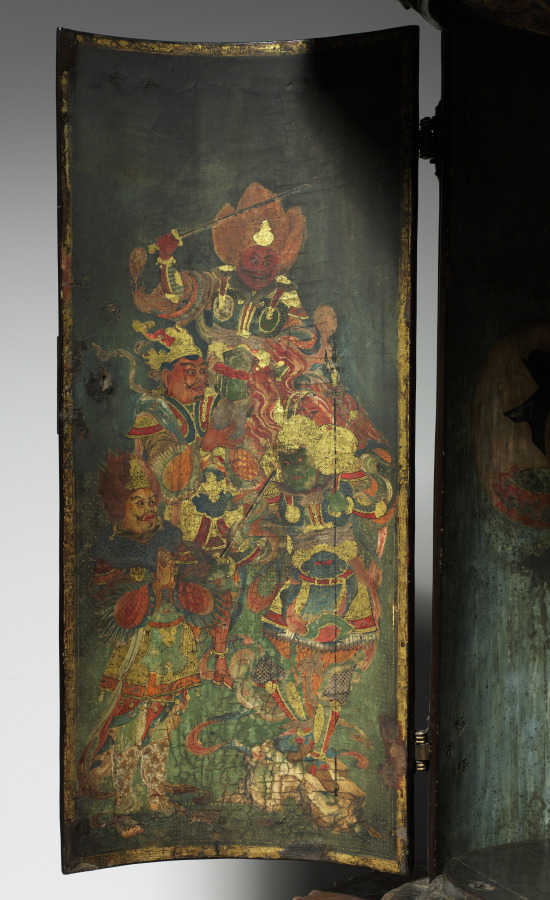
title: Repository for the Great Perfection of Wisdom Sutra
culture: Japan, Heian period (794–1185)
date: late 1100s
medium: lacquered wood with ink, color, gold, cut gold, and metalwork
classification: Lacquer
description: This repository is one of a pair that once contained the scrolls of a religious text called the Great Perfection of Wisdom Sutra. Two discs painted on the back have the sacred syllables representing the Buddha Shakyamuni and the Buddha Amida. Eight of the 16 benevolent but fierce looking deities who protect the text appear on the doors.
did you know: The mate to this object is in the Nara National Museum in Japan.